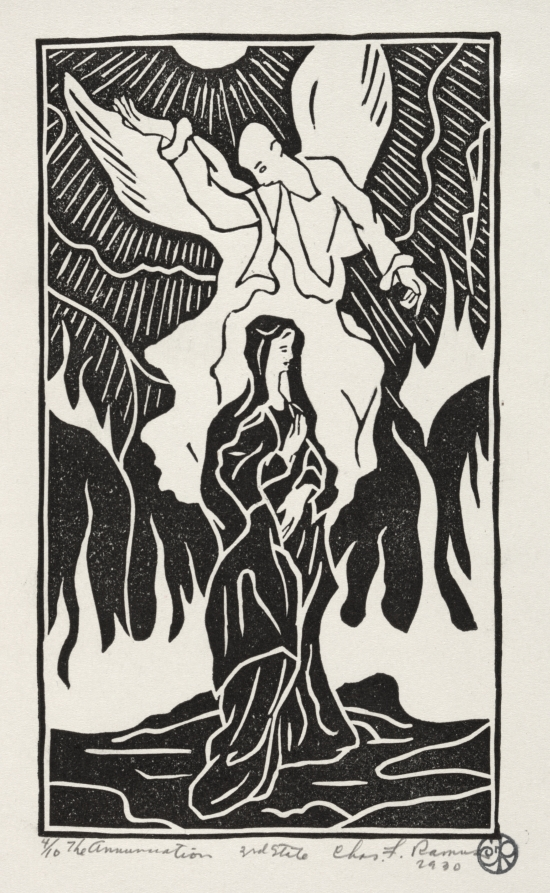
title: The Annunciation, Christmas Card for 1929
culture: America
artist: Charles Frederick Ramus (American, 1902–1979)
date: 1929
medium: linoleum cut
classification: Print